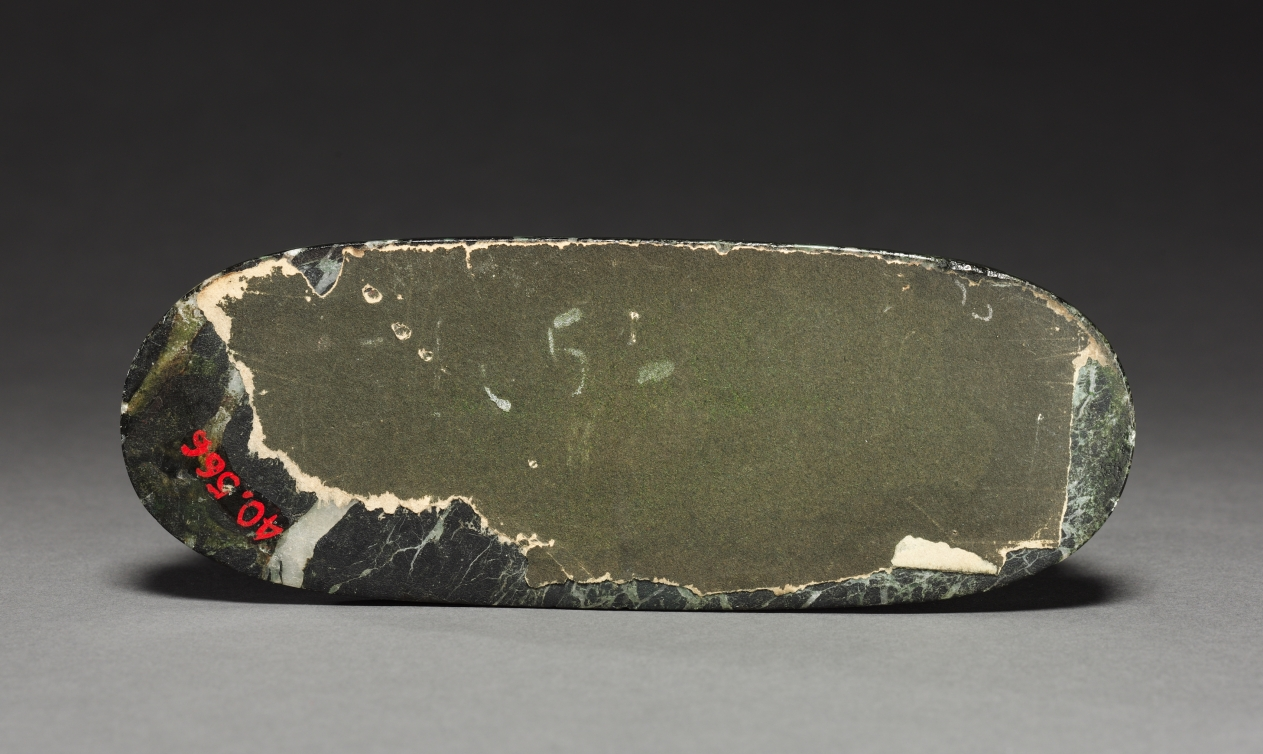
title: Axis Deer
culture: France, 19th century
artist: Antoine-Louis Barye (French, 1796–1875)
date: 19th century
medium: bronze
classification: Sculpture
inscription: Signed: "Barye"; faintly inscribed in small letters: "BARYE 21"